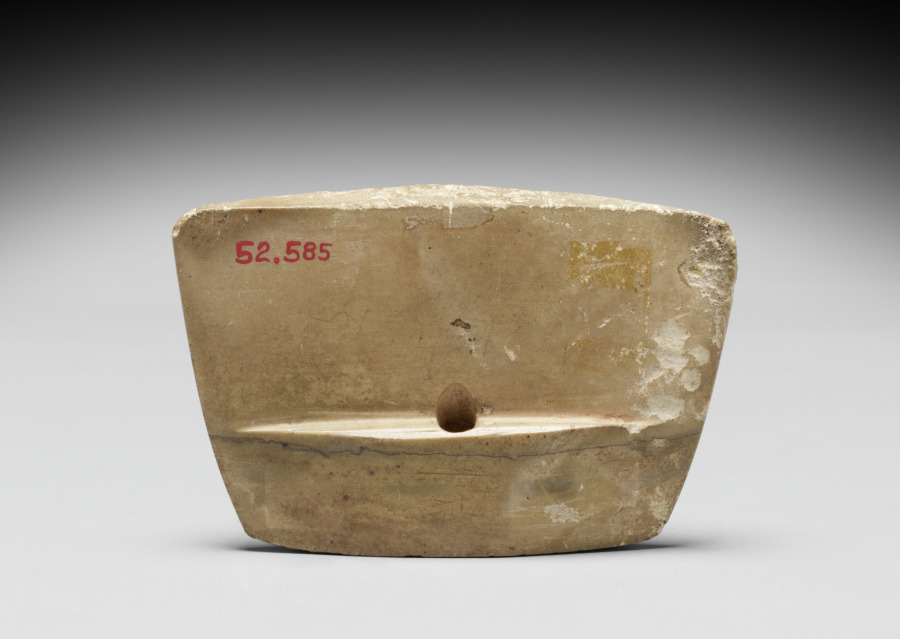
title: Taotie (Ogre Mask)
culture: China, Shang dynasty (c. 1600–c. 1046 BCE)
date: c. 1200–1050 BCE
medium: marble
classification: Sculpture